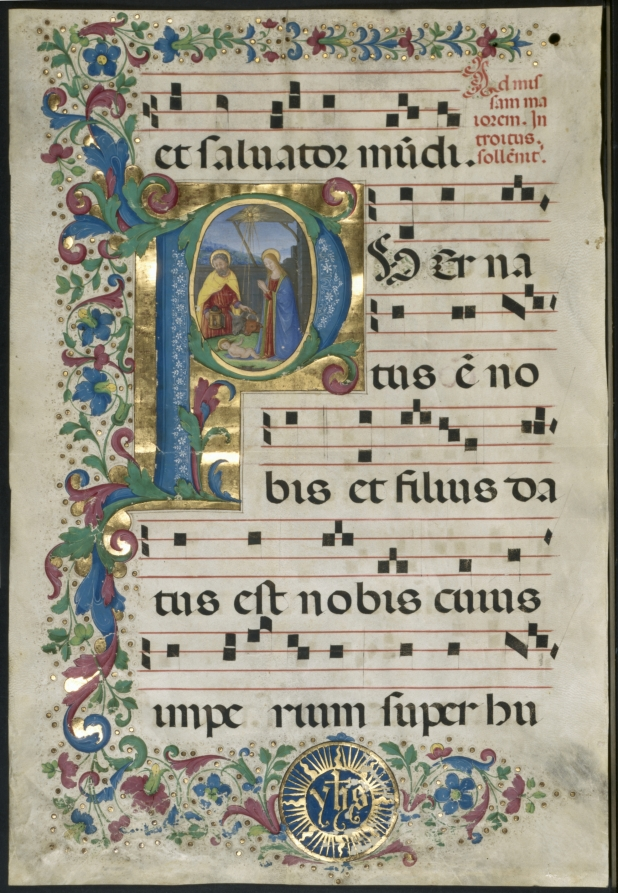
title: Leaf from a Gradual: Initial P with the Nativity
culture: Italy, Florence, late 15th, early 16th century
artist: Attavante degli Attavanti (Italian, c. 1452-c. 1525)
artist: Workshop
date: c. 1500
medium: ink, tempera and gold on vellum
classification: Manuscript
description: This beautiful initial P introduces the text Puer natus e[st] nobis, et filius datus est nobis (“For a child is born to us, and a son is given to us”) which marks the opening of the Introit for Christmas Day. The text, taken from Isaiah 9:6, continues, “. . . and his name shall be called Wonderful.” It is used to celebrate one of the most joyous events of the Christian Church—the birth of Christ. This splendid leaf from a manuscript gradual contains the chants used for solemn high Mass on Christmas Day. The initial P features sprays of foliage that emerge and migrate along three sides of the page. Painted by Attavante degli Attavanti, one of the most prominent Florentine illuminators of the late 15th century—whose patrons included Duke Federigo da Montefeltro of Urbino, King Matthias Corvinus of Hungary, and the Medici Pope Leo X—the initial is characteristic of Attavante’s use of a bright, sunny palette. His miniatures often include detailed landscapes with receding vistas and sundrenched hills, townscapes, and ultramarine skies.